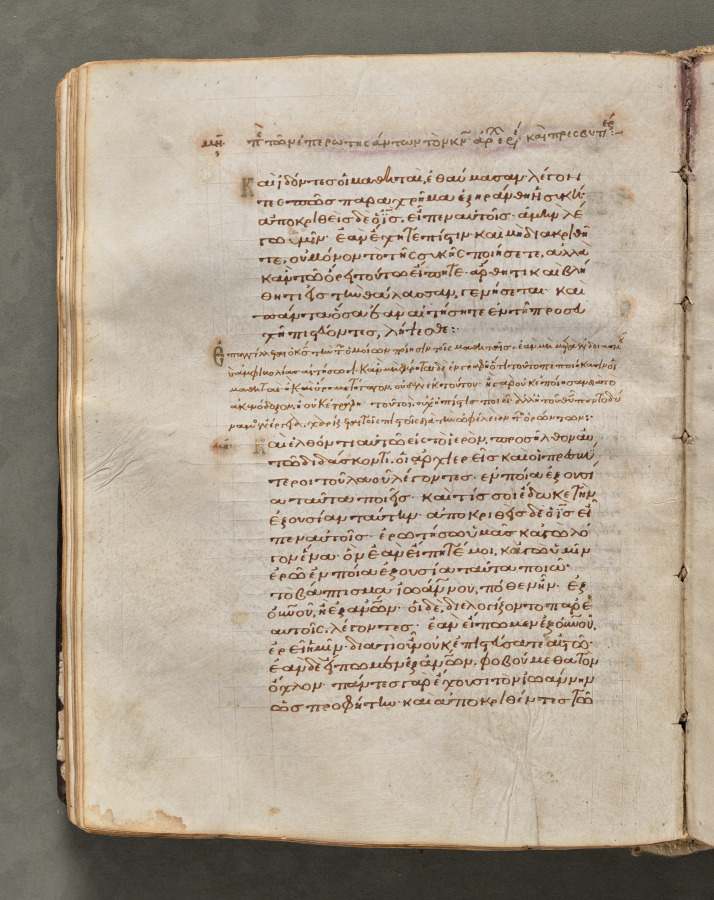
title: Text, folio 93 (verso), from a Gospel Book with Commentaries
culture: Byzantium, Constantinople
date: c. 1000–1100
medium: ink, tempera, and gold on vellum; leather binding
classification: Bound Volume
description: Each of the four gospels in this book opens on a page with brilliantly illuminated borders depicting the author of the text as well as birds-principally peacocks, symbols of the immortality of the soul-and fountains, representing the fountain of life and the salvation of the soul. This volume consists of 428 leaves with texts in Greek. Its level of sophistication suggests that it was probably written and decorated in a monastery in Constantinople.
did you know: Gospel Books were carried in procession through Byzantine churches.